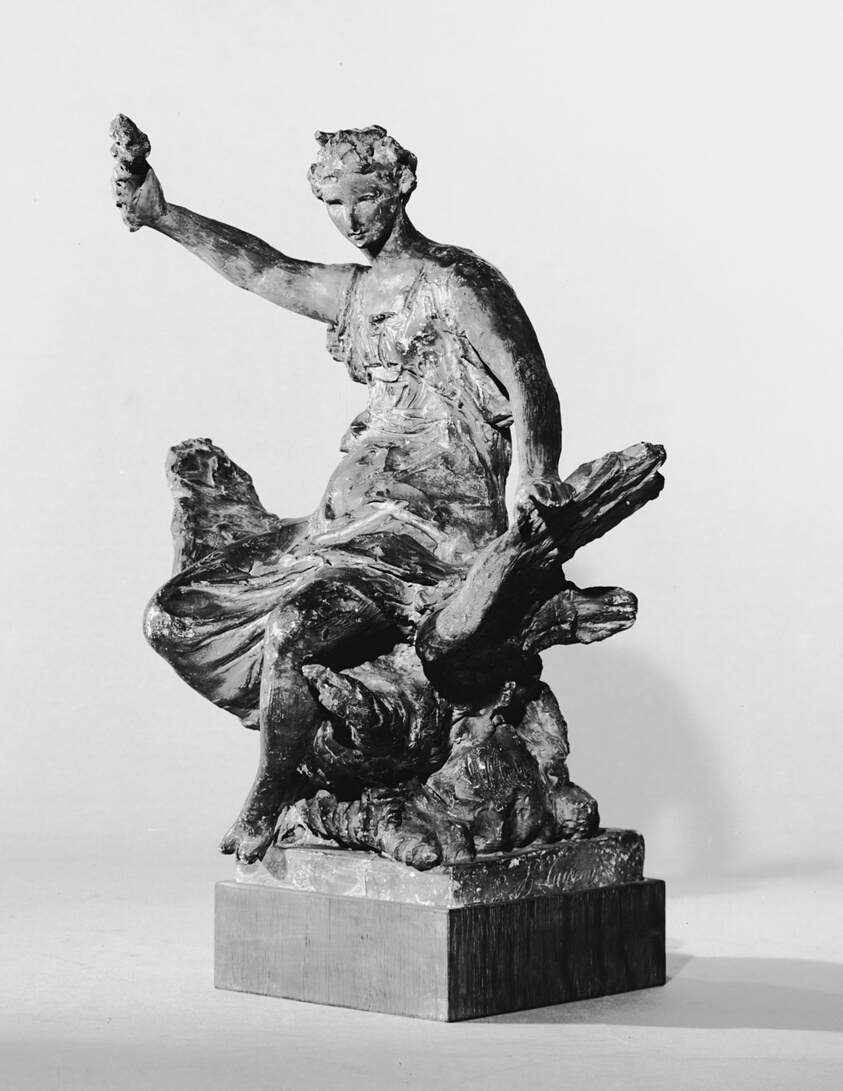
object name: Sculpture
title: France Lighting the World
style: nineteenth century, 19th century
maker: Jean Baptiste Carpeaux (French, 1827-1875)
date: 1865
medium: Plaster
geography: France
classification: statuette; french; sculpture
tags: France, world, woman, model, fire